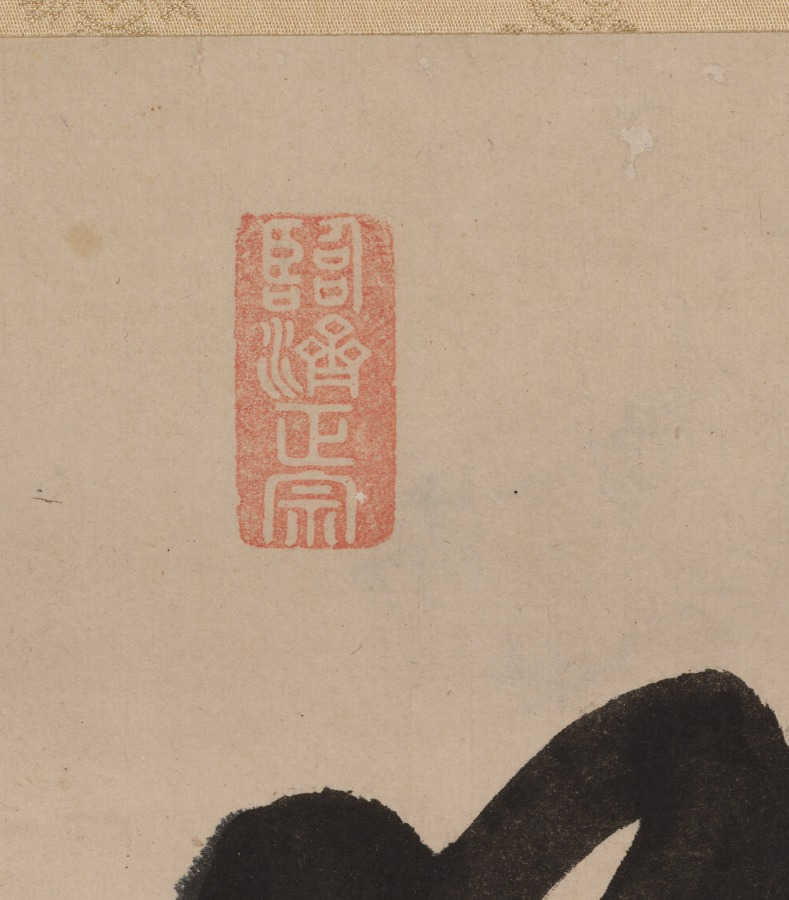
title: Calligraphy in Semi-Cursive Style (xing-caoshu)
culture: China, Qing dynasty (1644-1911)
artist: Yueshan Daozong (Chinese, 1629–1709)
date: c. 1660–1709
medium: hanging scroll; ink on paper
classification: Calligraphy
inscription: 吟風一樣松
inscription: 悅山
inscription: 道宗之印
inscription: Linji zheng zong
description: This bold calligraphy written by Yueshan, an Ōbaku school monk, consists of five characters tentatively translated as “Pine trees singing in the wind.” The line is from Cold Mountain Poems (Hanshan shi). Cold Mountain is the pen name (hao) of the poet monk Han Shan, as well as the name of a place. In one poem Han describes getting lost on the road to Cold Mountain, perhaps an allusion to the search for religious enlightenment.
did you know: The Ōbaku school of Chan (Zen in Japanese) Buddhism was founded in Japan by Chinese monks in the 1600s. The monk Yueshan emigrated from the Chinese province of Fujian to serve as priest and later abbot at Manpukuji, the headquarters of the Ōbaku school in Japan.